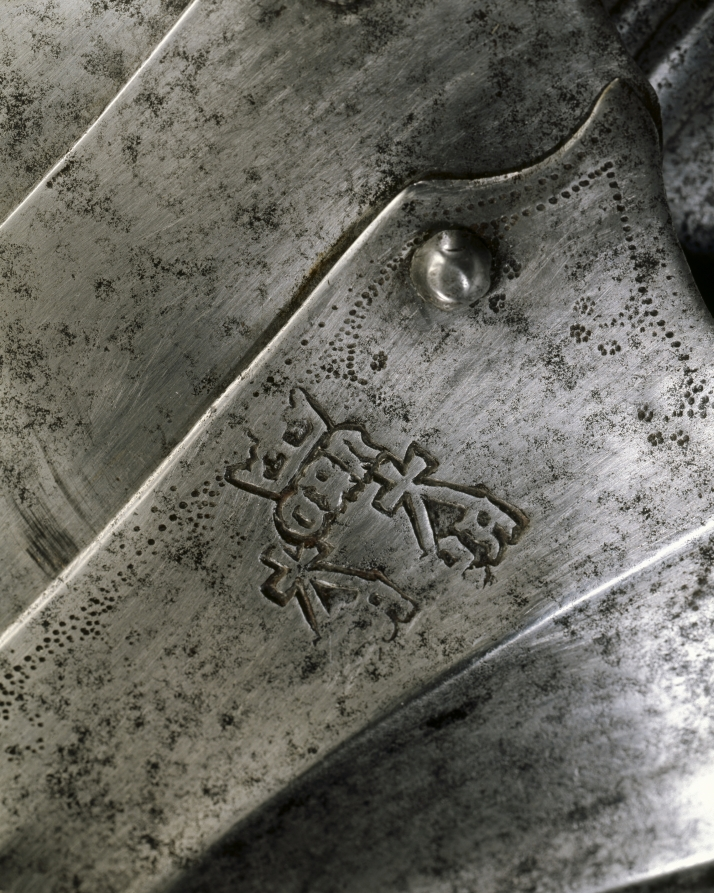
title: Gothic Fan-Shaped Pauldron (left)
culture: Italy, Milan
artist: Antonio Missaglia (Italian, 1416/17–1495/96)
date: c.1485–1500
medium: steel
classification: Arms and Armor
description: When the elements that made up a suit of armor had been forged, shaped, and polished, they were inspected for fit and finish. At this stage the master armorer would use a punch to stamp each element with his maker's mark. Other associated marks might include a town or guild mark, depending on the city of origin. The set of three marks shown here are of a type known to be Milanese. The upper mark seems to show three letters beneath a crown, while the mark below, twice repeated, is a split cross with the letters inside. These probably refer to the Missaglias.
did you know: A pauldron is a component of plate armor that covers the shoulder and often the armpit, and parts of the back and chest as well.